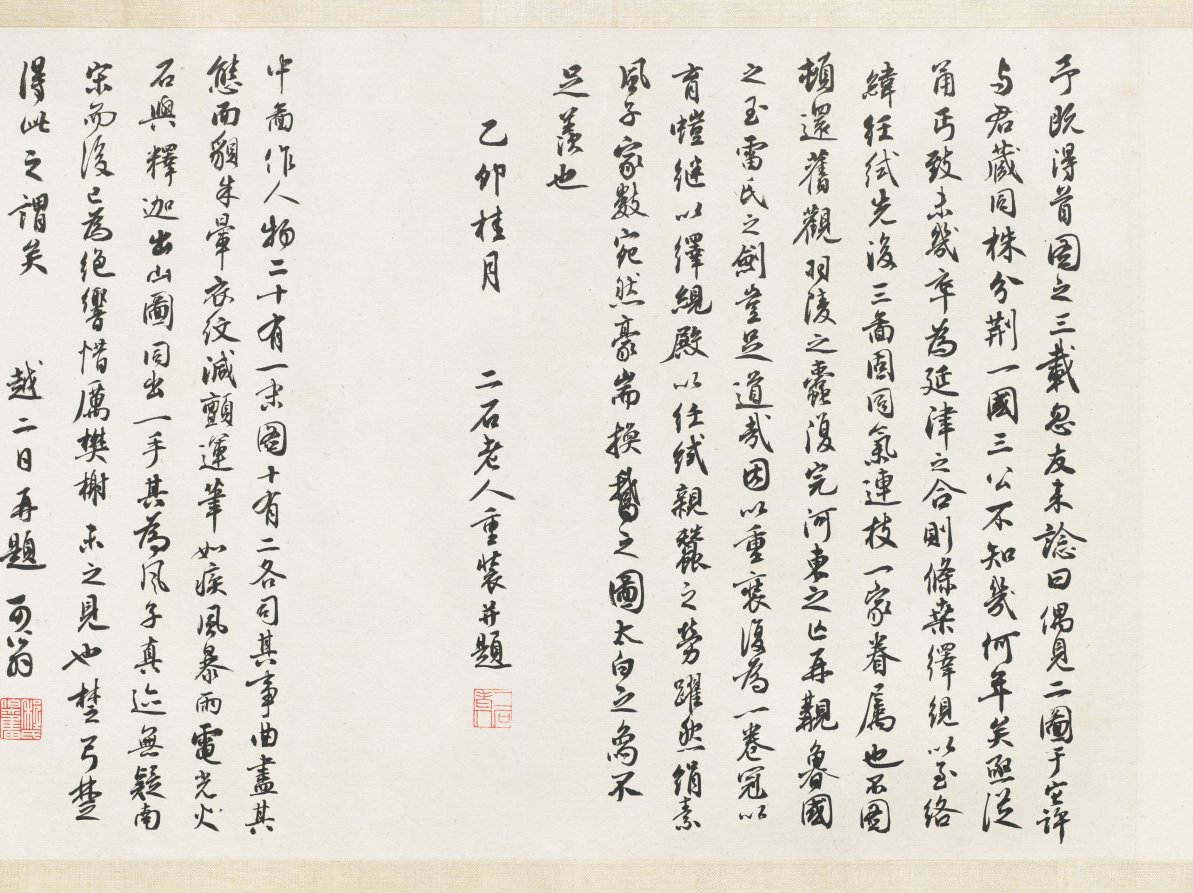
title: Sericulture (The Process of Making Silk)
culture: China, Southern Song dynasty (1127-1279)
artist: attributed to Liang Kai (Chinese, mid-1100s–early 1200s)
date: early 1200s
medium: Handscroll; ink and color on silk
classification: Painting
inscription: 3 colophons and 7 seals of Ch'eng Ch'i (20th c.).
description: By the Southern Song period, the economic center of the silk industry had shifted to the lower Yangzi delta, while the north continued to be troubled by wars. Divided into three sections, the handscroll illustrates 14 steps in the process of making silk, from the raising of silkworms to the weaving of silk cloth. The scroll’s scenes follow the illustrations of Lou Shou’s (1090–1162) Pictures of Tilling and Weaving (gengzhi tu), the first recorded painting of this genre, which was conceived in Hangzhou around 1145. However, in the Cleveland painting the artist groups several scenes of sericulture together under the roof of an open structure.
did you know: The painting is attributed to Liang Kai, a court artist active from about 1201 to 1204 at the Imperial Painting Academy in the city of Hangzhou, a major silk weaving center from that time to the present day.